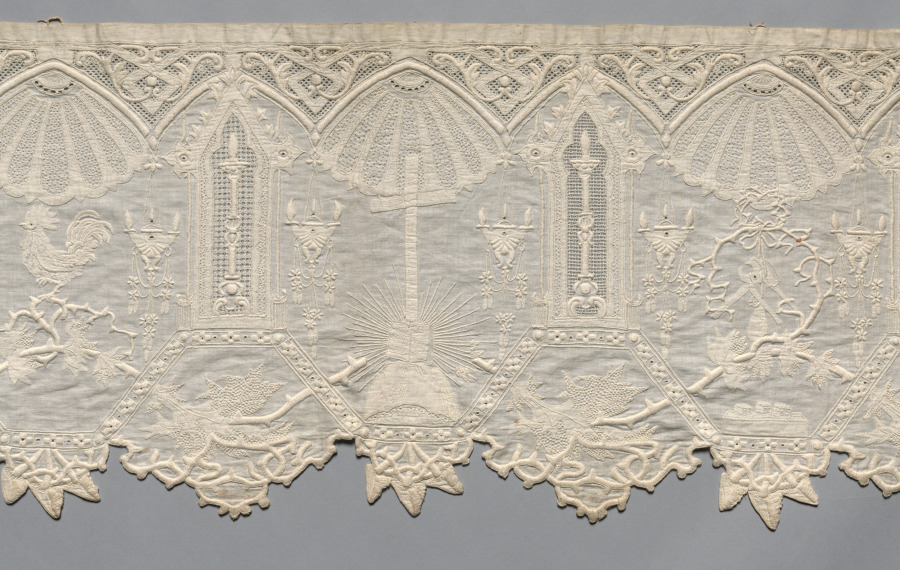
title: Altar Cloth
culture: Italy(?)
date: 1800s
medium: Plain weave cotton: needle lace (drawnwork), appliqué, and embroidery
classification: Embroidery